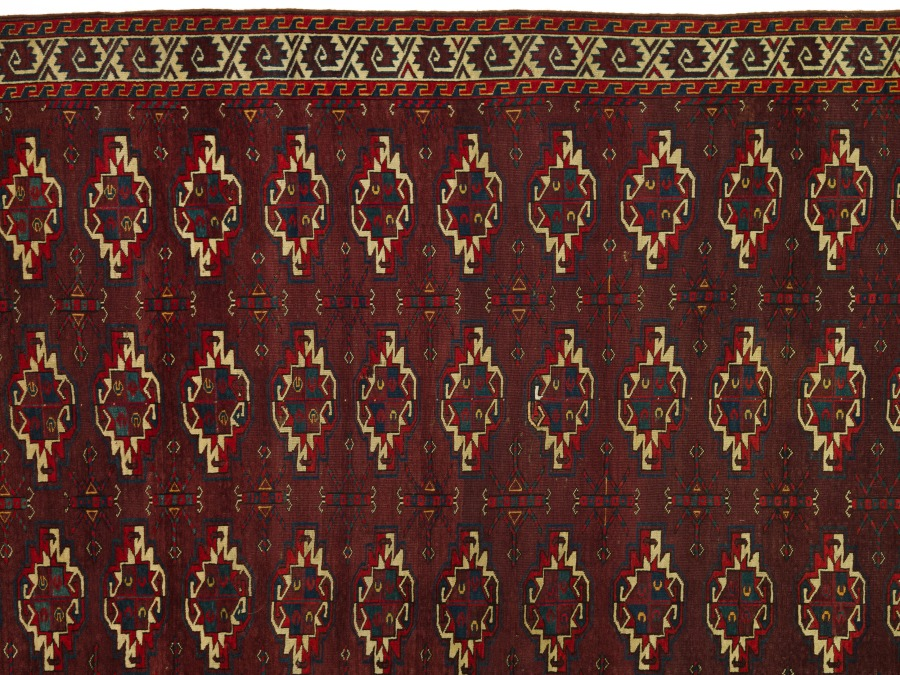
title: Turkmen Main Carpet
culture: Turkmenistan, Yomud tribe, 19th century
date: mid-1850s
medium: Wool, knotted pile, 128-136 symmetrical knots per square inch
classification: Carpet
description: In the Islamic world, carpets symbolize status and wealth. A carpet’s origin can be identified by its design, color, and technique. Shades of red and lobed motifs, or guls, are hallmarks of Turkmen carpets woven by nomadic tribes across northeast Iran, Afghanistan, and central Asia. This main carpet of the Yomud tribe features beautiful colors in the guls on a rich aubergine ground; the decorated skirts, or elem, with stylized flora at each end, are its rarest feature. This carpet would have been the prized possession within the living quarters of a round tent, or yurt.